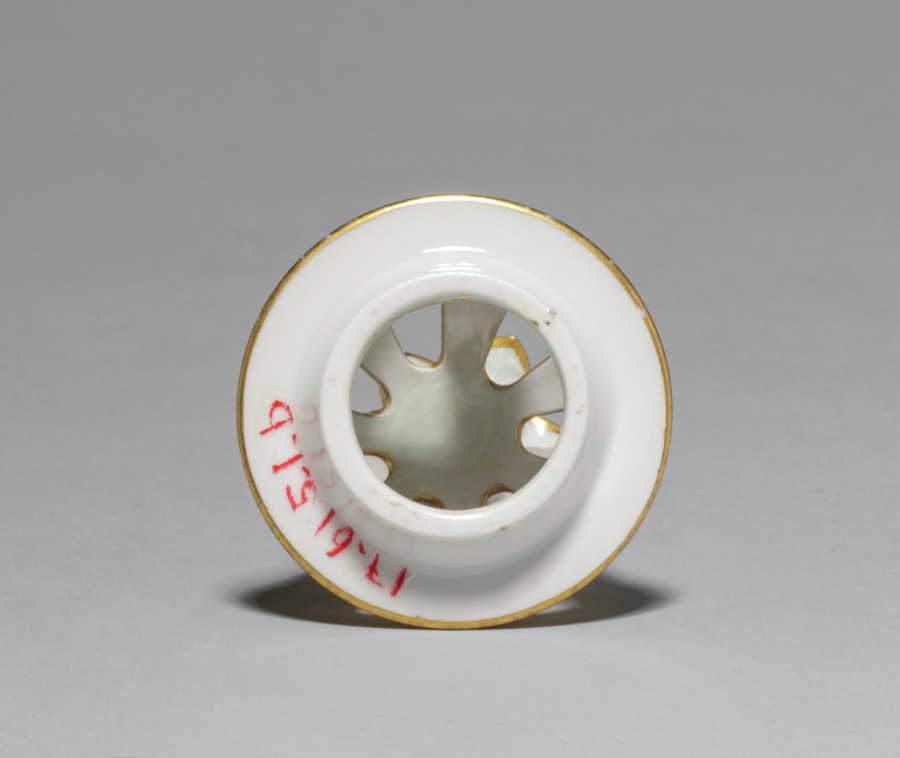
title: Urn (cover)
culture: England, Worcester, 19th century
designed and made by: Flight, Barr and Barr (British)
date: c. 1815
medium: artificial porcelain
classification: Ceramic